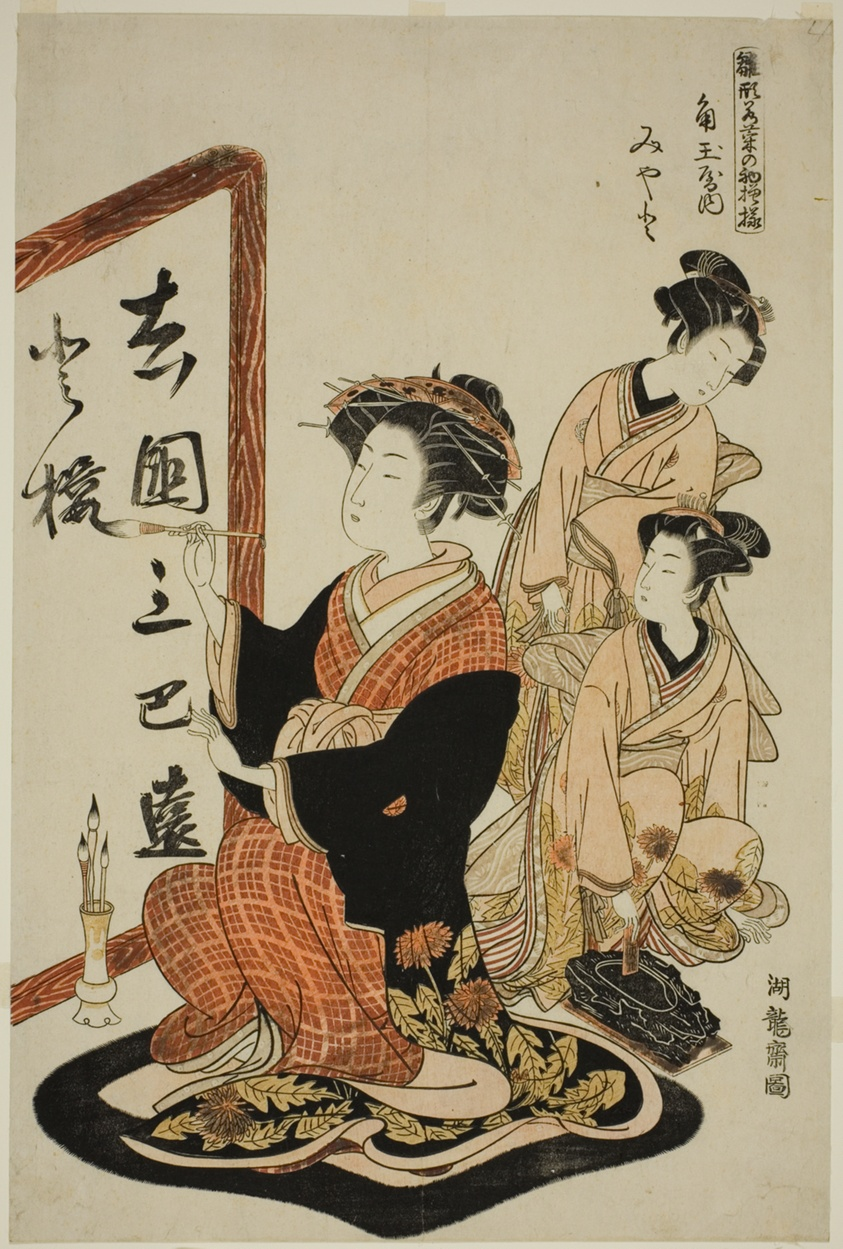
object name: Print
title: Miyato of the Kadotamaya, from the series "Models for Fashion: New Designs as Fresh as Young Leaves (Hinagata wakana no hatsu moyo)"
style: Japanese (culture or style)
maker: Isoda Koryusai (Japanese, 1735-1790)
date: c. 1777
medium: Color woodblock print; oban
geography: Japan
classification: woodblock print; print; asian art